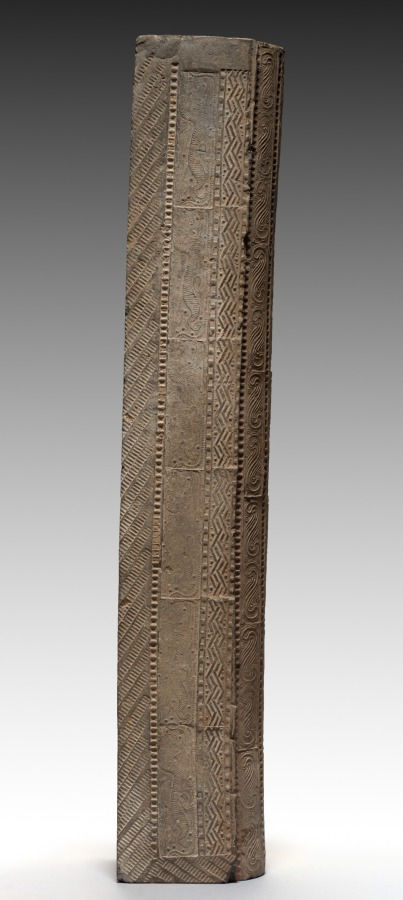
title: Hollow Tile: Lintel from Tomb-Chamber Doorway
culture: China, Han dynasty (202 BCE–220 CE)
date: 100–200 CE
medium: earthenware, die-stamped relief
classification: Ceramic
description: Striding tigers (top), racing horsemen (right column), and reverent officials (left column) are stamped into the surface of this underground portal to a tomb. The doorway preserves in stone the post-and-lintel structure, a basic element of Chinese wooden architecture. By the first century CE, a revolution in Chinese tomb construction and furnishing had taken place. Tombs lined with decorated bricks and tiles replace the earlier tombs constructed with only rammed-earth walls. Ceramic surrogates or models of stoves, houses, servants, and pets filled these more durable chambers, symbolically extending the creature comforts of this world into the world after death.